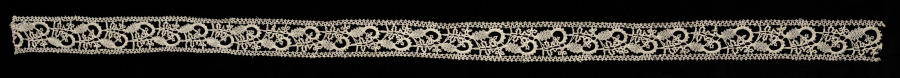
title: Lace Band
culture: Italy, Venice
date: 1600s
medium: Bobbin lace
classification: Lace